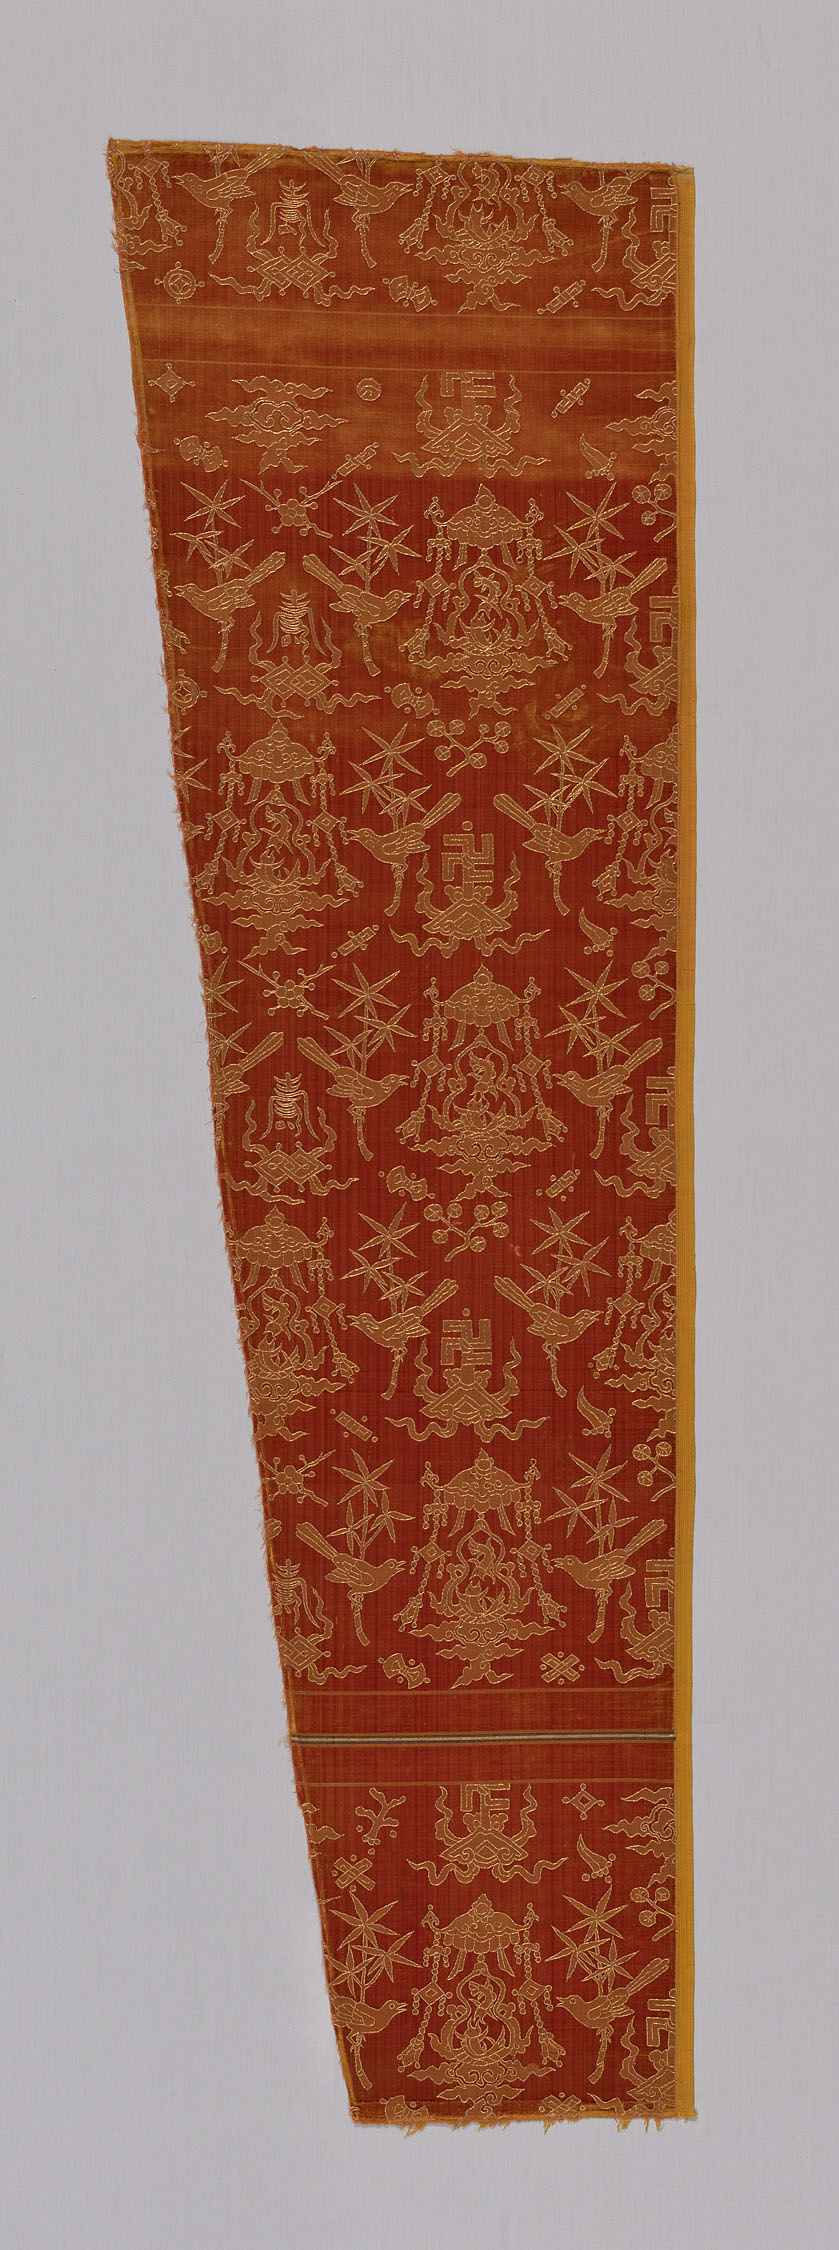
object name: Textile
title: Fragment (Dressing Fabric)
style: ming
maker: China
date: Ming dynasty (1368–1644), 16th century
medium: Silk and gold-leaf-over-lacquered-paper-strip-wrapped silk, chevron twill weave with supplementary patterning wefts and supplementary pile warps forming cut and uncut voided velvet; embroidered with silk and gold-leaf-over-lacquered-paper-strip-wrapped silk in laidwork and couching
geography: China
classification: textile; needlework (visual works); weaving